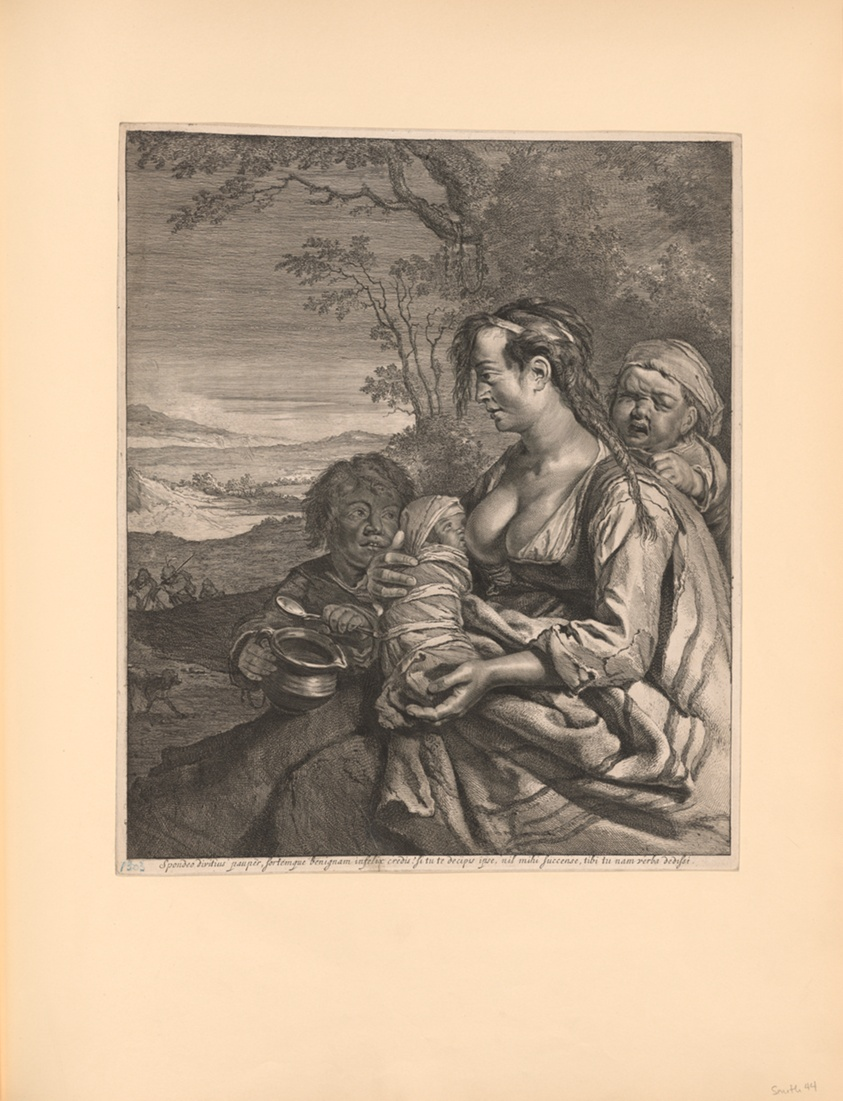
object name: Print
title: The Bohemian Woman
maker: Cornelis Visscher (Dutch, c. 1629-1658)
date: c. 1655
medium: Etching and engraving on paper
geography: Netherlands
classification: engraving; paper; print; prints and drawing